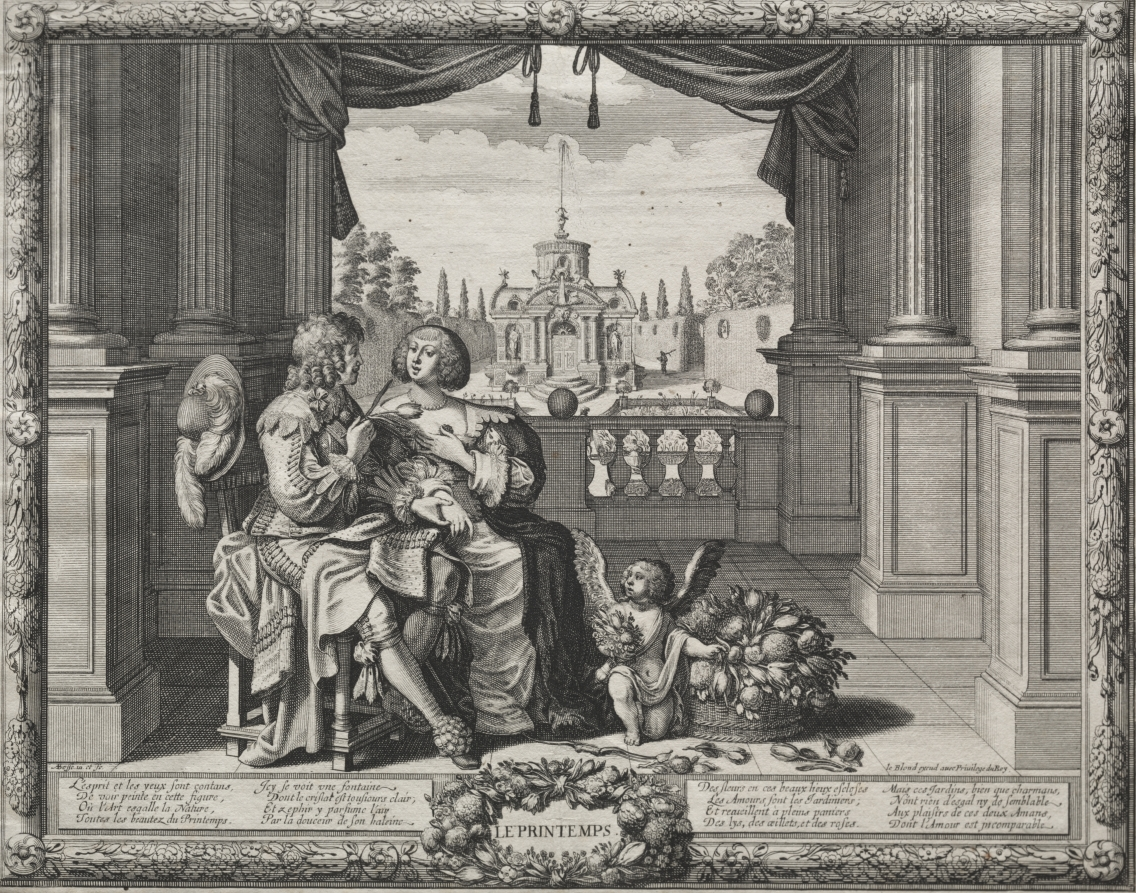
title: The Four Seasons: Springtime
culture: France, 17th century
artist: Abraham Bosse (French, 1602–1676)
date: 1635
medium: engraving and etching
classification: Print